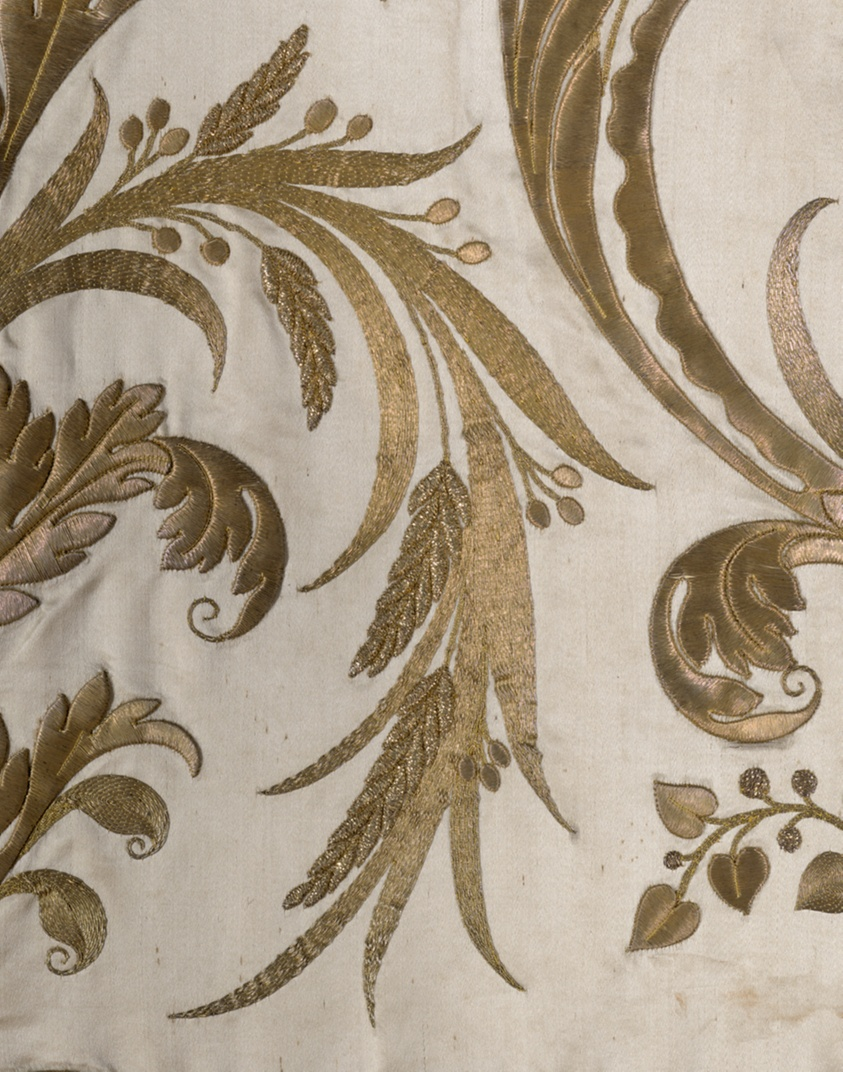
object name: Costume and Accessories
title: Skirt from a Court Gown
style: 19th century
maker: France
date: 1805-15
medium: Silk, satin weave; embroidered with gold metal-wrapped over a silk fibre core, gold frisé, silk, gold metal formed ornaments, "purl," spangles, gold metal strips; couching over paper core and silk padding, in pattern and backstitch; trimmed with bobbin lace made of gold metal strip wound around a silk fibre core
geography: France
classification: textile; needlework (visual works); costume; costume - embroidery; skirt (garment)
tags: lilies, flowers